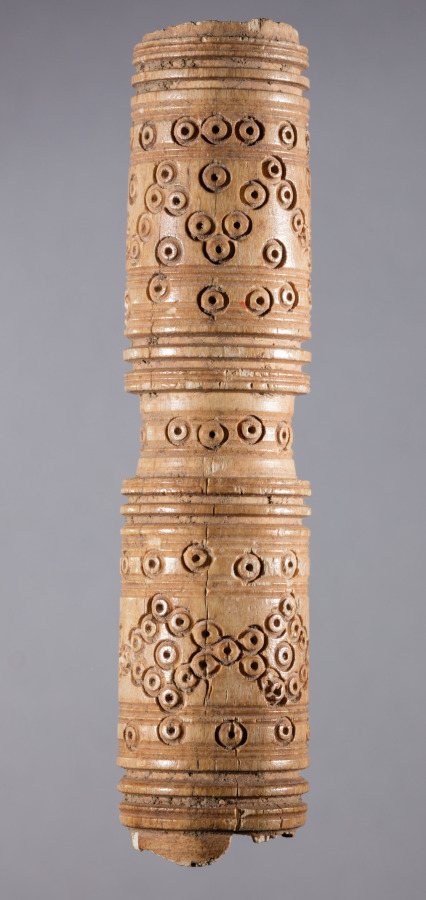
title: Hollow Tube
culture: Iran, early Islamic period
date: 700s - 900s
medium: bone, incised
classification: Miscellaneous